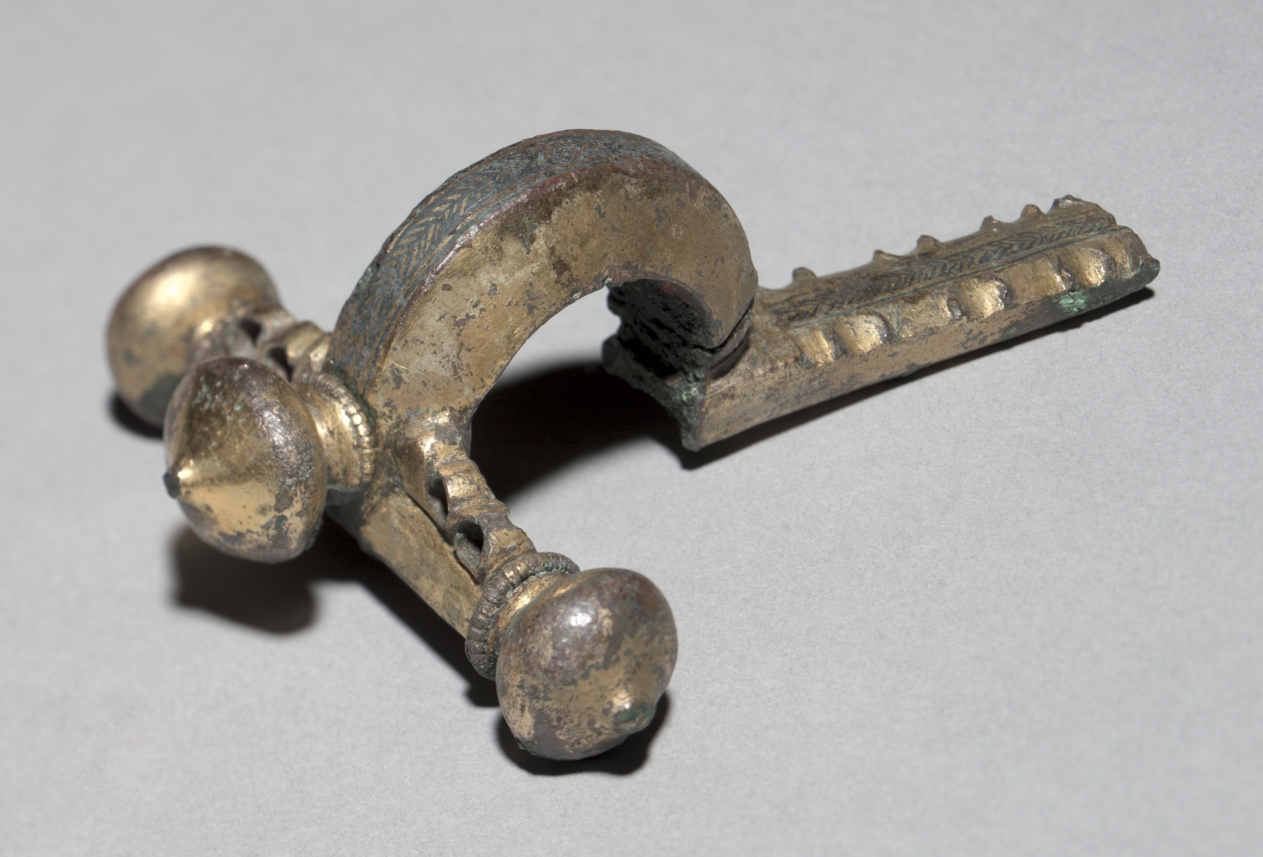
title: Crossbow Fibula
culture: Gallo-Roman or Romano-British, Migration period, 4th century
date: c. 350–400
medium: bronze, gilt-bronze, silver, and niello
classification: Jewelry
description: A fibula was a garment clasp that functioned somewhat like a modern safety pin. Since buttons were not used in antiquity, fibulae were used to keep a cloak closed. They were worn by both men and women, commonly on the right shoulder, and produced in various sizes and shapes. Because they were highly visible accessories, they often received decorative gilding, inlay decoration, or onion-shaped domes. Crossbow fibulae were introduced by the Romans and are named for their resemblance to the weapon. Decorative and technical features suggest this may have been made in Roman-occupied Britain.